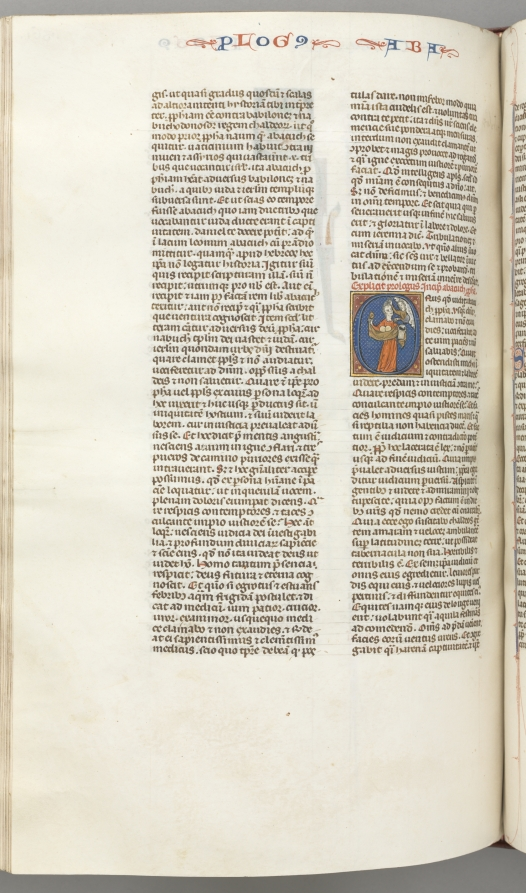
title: Fol. 361v, Habbakuk, historiated initial O, Habbakuk holding a basket and two stones, seized by the hair by an angel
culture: Southern France, Toulouse(?), 13th century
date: c. 1275–1300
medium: ink, tempera, and gold on vellum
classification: Bound Volume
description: Biblical manuscripts were highly prized and important possessions of churches, monasteries, cathedral schools, and universities throughout medieval Europe. The biblical texts were known as the vulgate, the translations made by Saint Jerome in the fourth century from Hebrew and Greek into Latin, which became the definitive and official Latin version of the Roman Church. In the 13th century, the bible was, for the first time, produced as a single volume with an officially sanctioned sequence to its books and chapters as illustrated by this example. The very extensive decoration of this bible is arranged hierarchically to indicate the relative importance of the various texts so that full or almost full-page initials mark the openings of the first prologue, Genesis, and the first Gospel; historiated initials mark the beginning of each book and illuminated initials mark the Prologues.